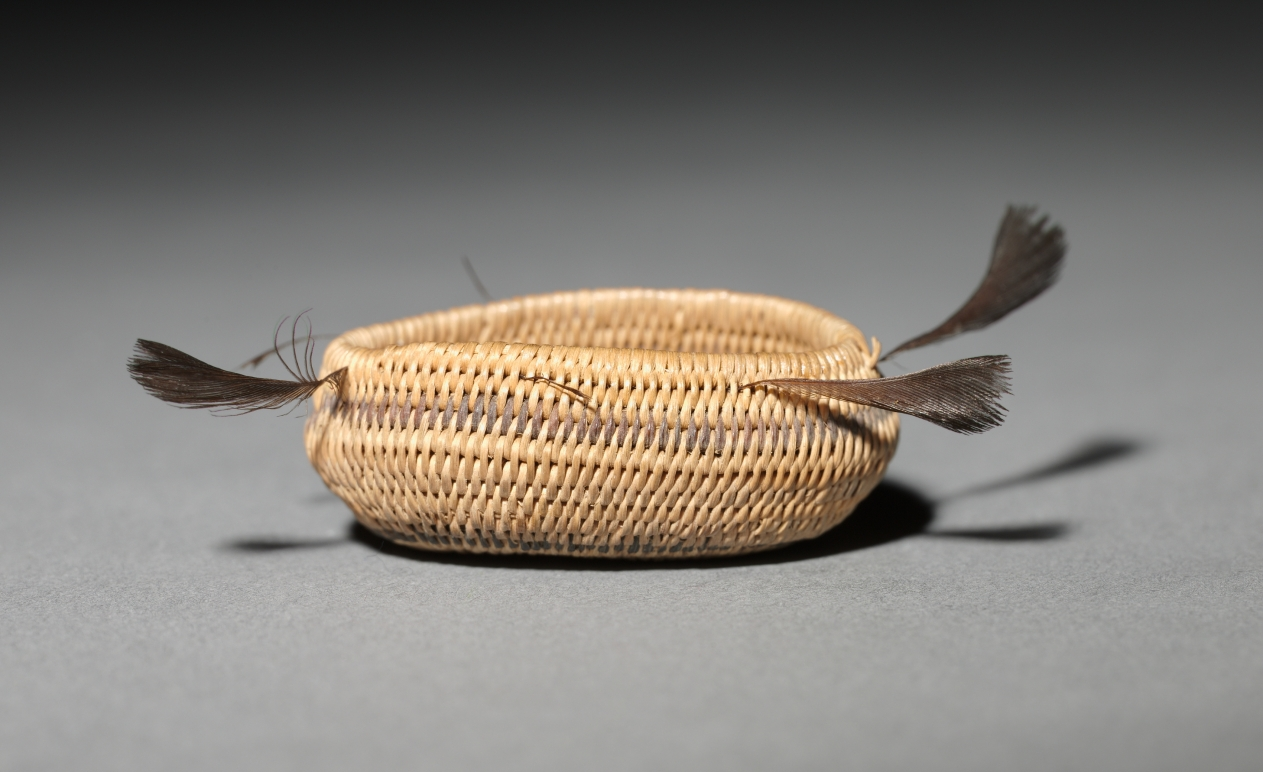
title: Miniature Rhomboidal Basket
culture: California, Pomo, 20th century (?)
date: Early 1900s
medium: coiled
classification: Basketry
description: Miniature baskets were made to demonstrate the basket-maker’s virtuoso skill, and these tiny marvels seem to be no exception—the smallest are just a few millimeters wide but still patterned. For such fine work, dexterity was required as much for preparation of materials as for weaving.